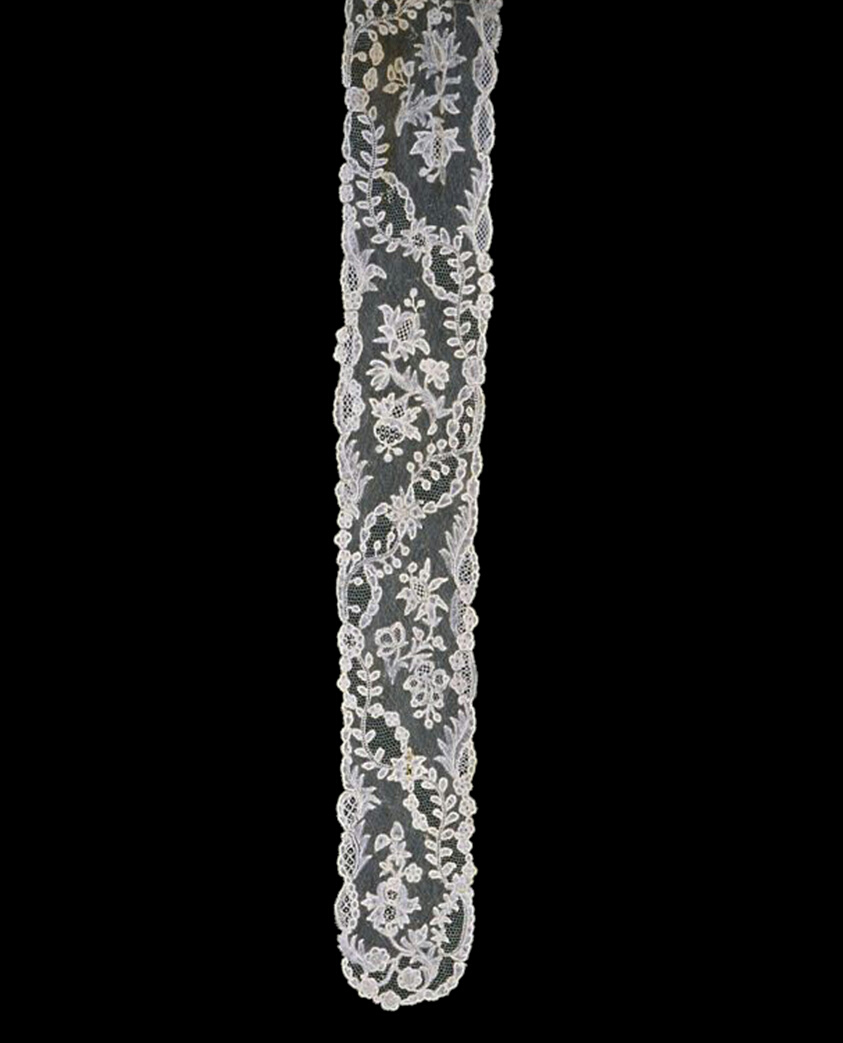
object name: Costume and Accessories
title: Pair of Lappets (Joined)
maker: Belgium, Flanders, Brussels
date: 1765/75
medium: Linen, bobbin part lace of a type known as "Brussels" with a Droschel mesh ground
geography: Flanders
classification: costume accessory; lace - bobbin; textile; costume; costume accessory - headdress; costume accessory worn above the waist